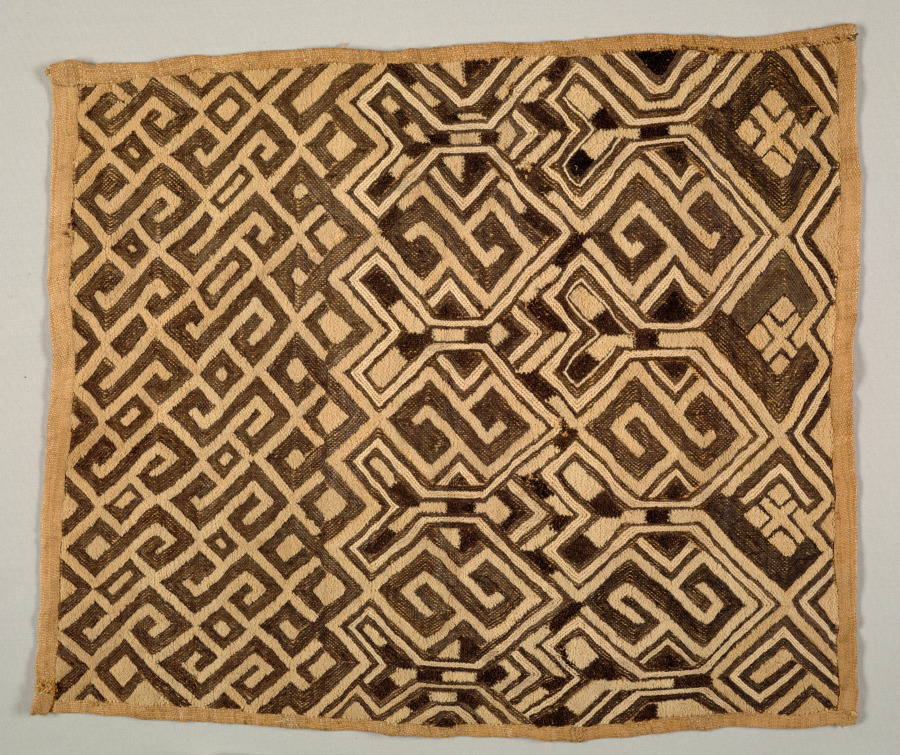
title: Embroidered Raffia Pile Cloth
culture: Africa, Central Africa, Democratic Republic of Congo, Kuba peoples, 20th century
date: 1900s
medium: Raffia and dye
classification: Embroidery